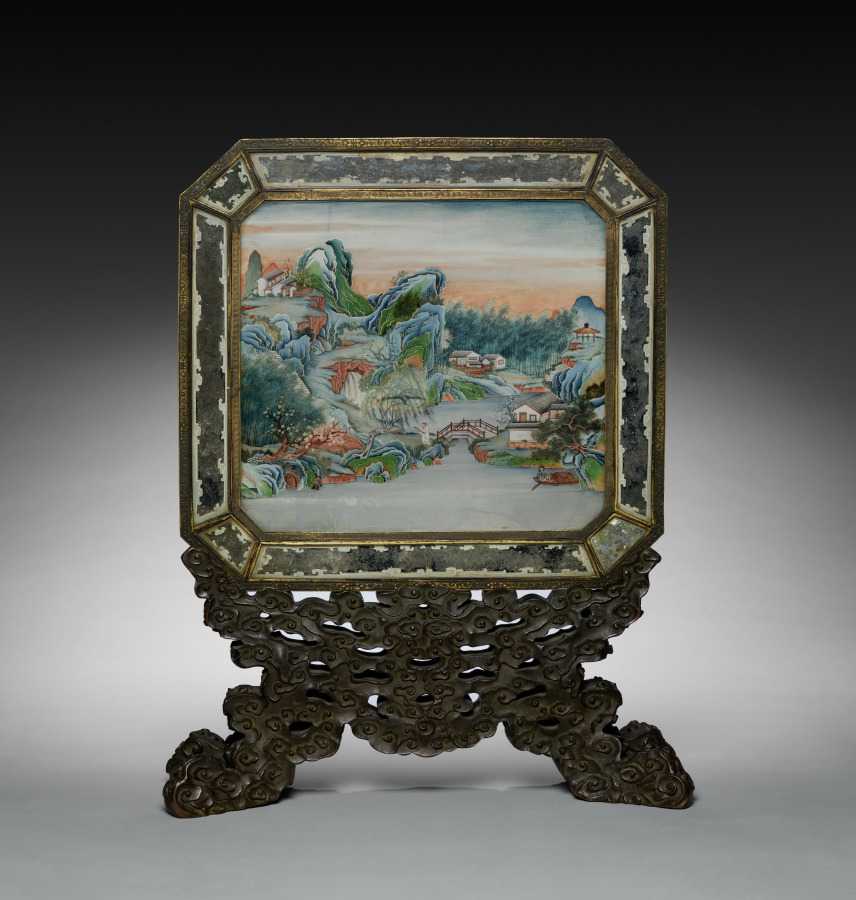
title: Screen with European Figures (obverse) and Landscape (reverse) with Stand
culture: China, Beijing palace workshops, Qing Dynasty (1644-1911), Qianlong reign (1736-1795)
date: 1736–95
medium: painted enamel, glass painting, and cast-iron stand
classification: Enamel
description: On the obverse side of this two-sided table screen is an enamel-painted copper plaque with European figures. The image is probably derived from prints. European enamelware was introduced to China through missionary-artists at the Beijing court and foreign trade in Guangzhou. On the reverse side is a glass painting of architectural landscape in the Chinese style. At the Qing court, imperial commands made possible artistic collaboration and the incorporation of different artistic expressions in a single artwork.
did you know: The screen is balanced on a heavy cast-iron base.